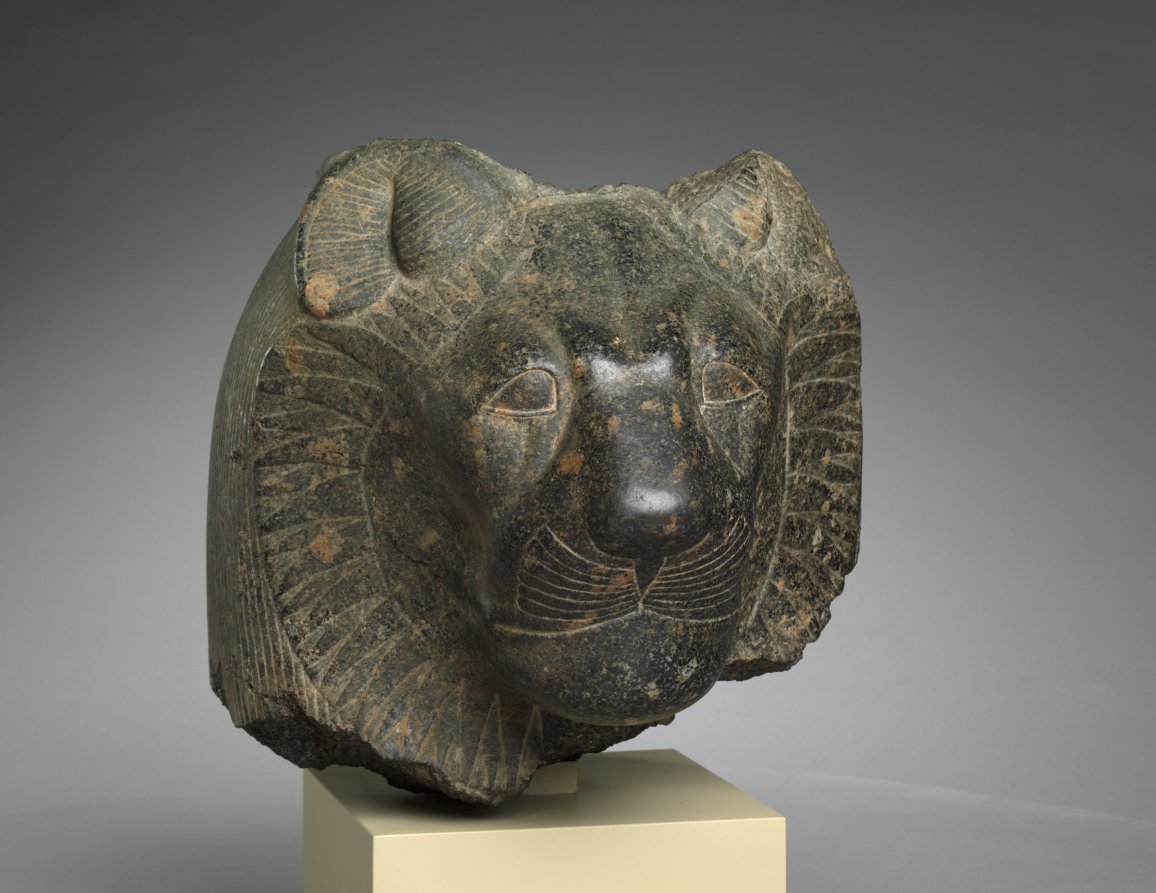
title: Head of Sekhmet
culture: Egypt, Thebes(?), New Kingdom (1540–1069 BCE), Dynasty 18, reign of Amenhotep III (1390–1352 BCE)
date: c. 1391–1353 BCE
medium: granodiorite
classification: Sculpture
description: This lioness head once belonged to a grand statue of the goddess Sekhmet, "the powerful one," probably seated and wearing a tight dress. Possibly appealing to her healing aspect, Pharaoh Amenhotep III, often described as “beloved of Sekhmet,” commissioned and dedicated hundreds of large granodiorite Sekhmet sculptures in his Theban mortuary temple. Thus, this head likely comes from Thebes, perhaps later moved across the Nile—like many such sculptures—to the temple of Mut, a related deity, at Karnak. Behind her stylized ruff, Sekhmet wears a wig, once crowned with a sun disk and uraeus, the stylized cobra symbolizing royal or divine power.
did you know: Amenhotep III may have dedicated 730 statues of Sekhmet, two for each day of the year.